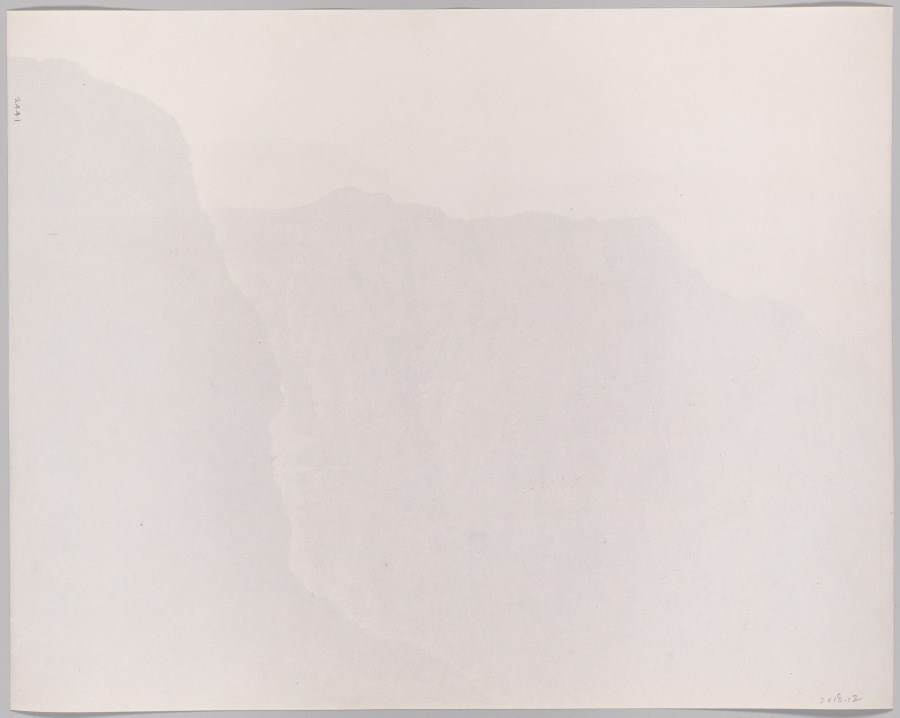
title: View of Hills near Mahabaleshwar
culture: England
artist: Colin Murray (British, 1840–1884)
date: early 1870s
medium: albumen print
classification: Photograph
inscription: Written in pencil on verso: “2441”